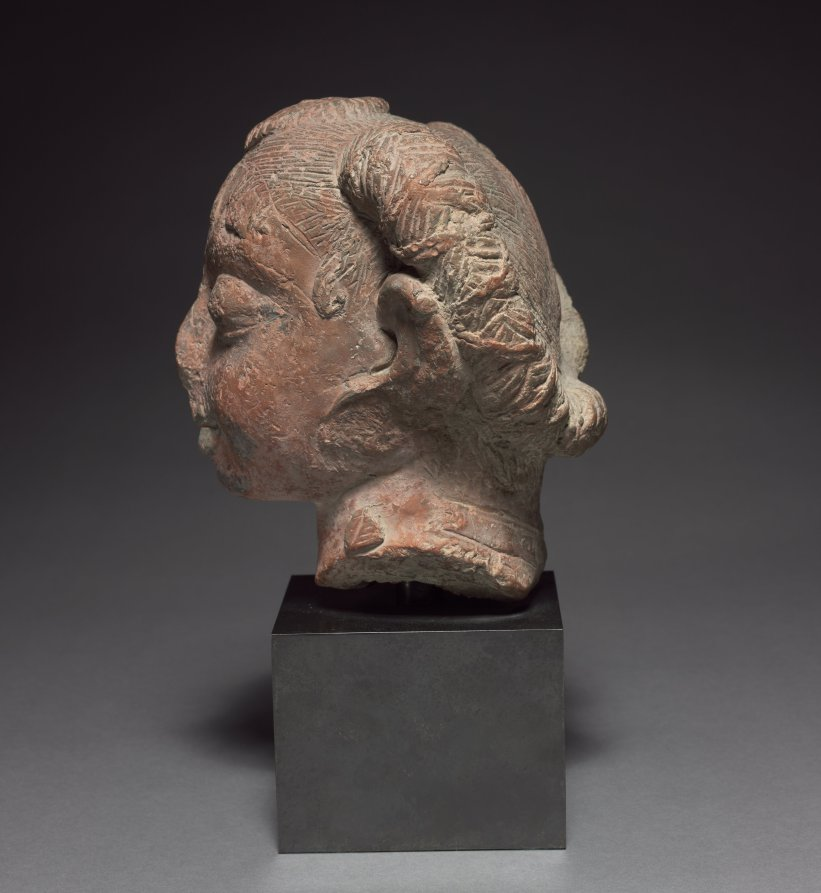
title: Female Head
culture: India, Gangetic plain region, Gupta period, 5th-6th centuries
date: 400s–500s CE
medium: terracotta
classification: Stone